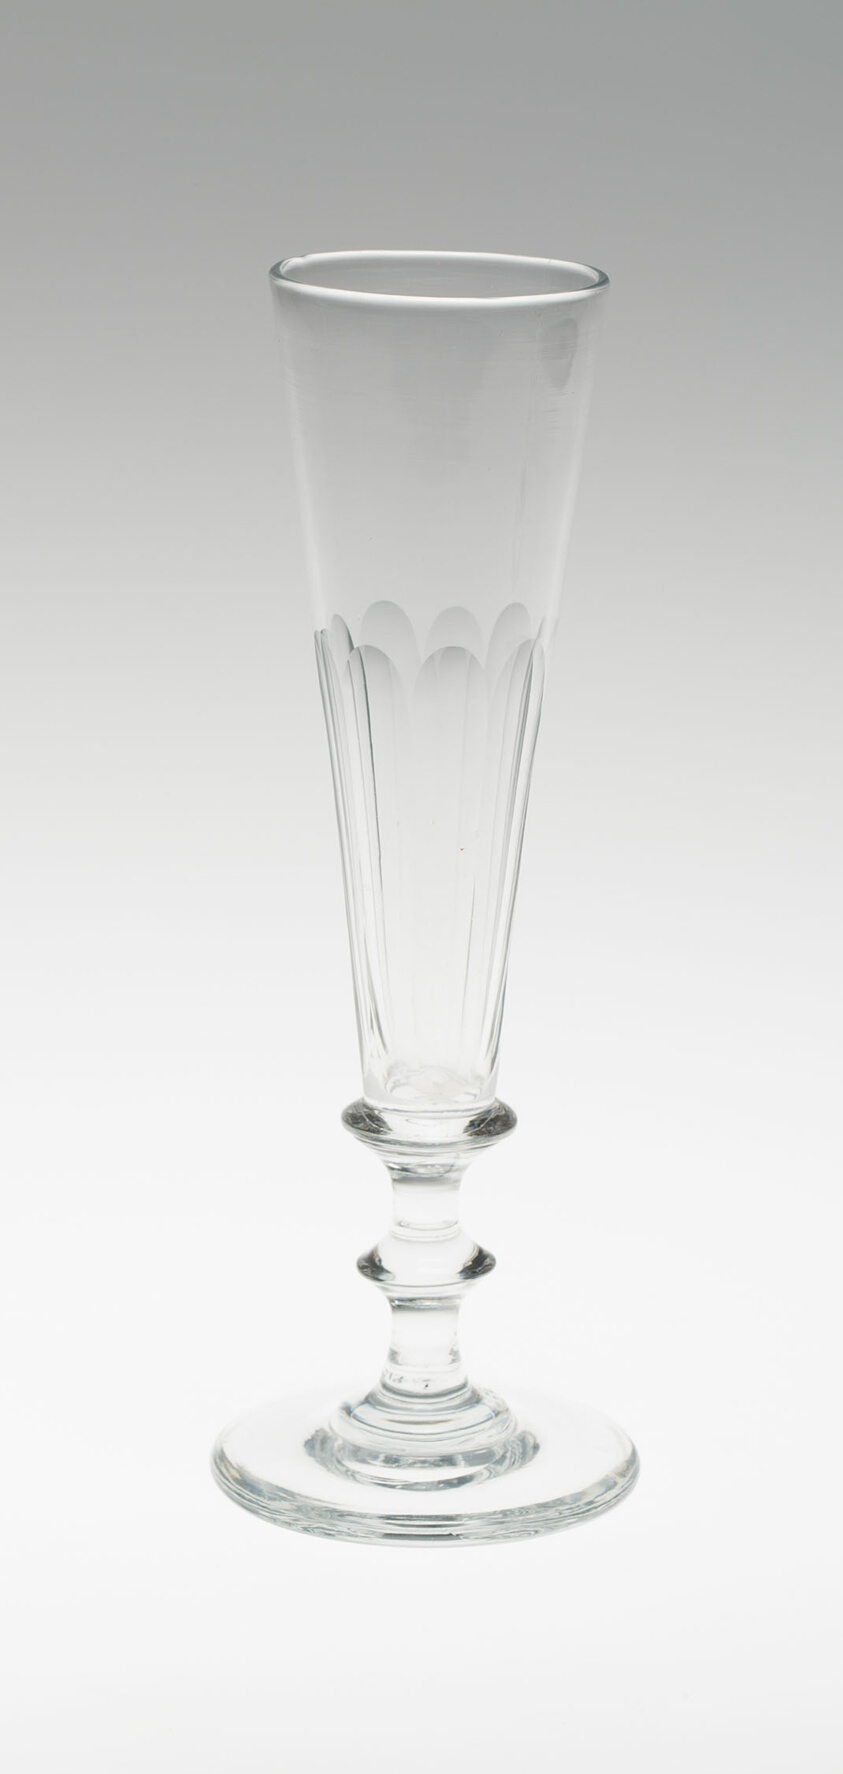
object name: Glass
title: Flute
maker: England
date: c. 1850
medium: Glass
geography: England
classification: glass